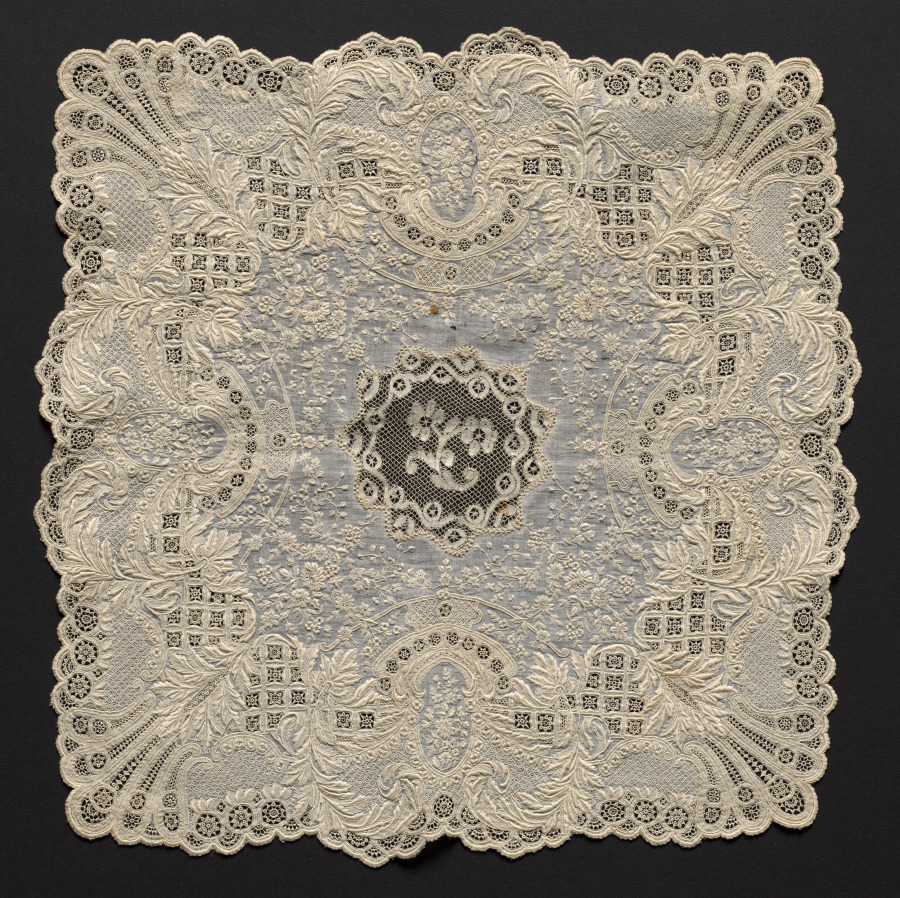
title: Lace Handkerchief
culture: Switzerland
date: 1700s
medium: Plain weave linen with bobbin lace (Valenciennes) center and embroidery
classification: Embroidery